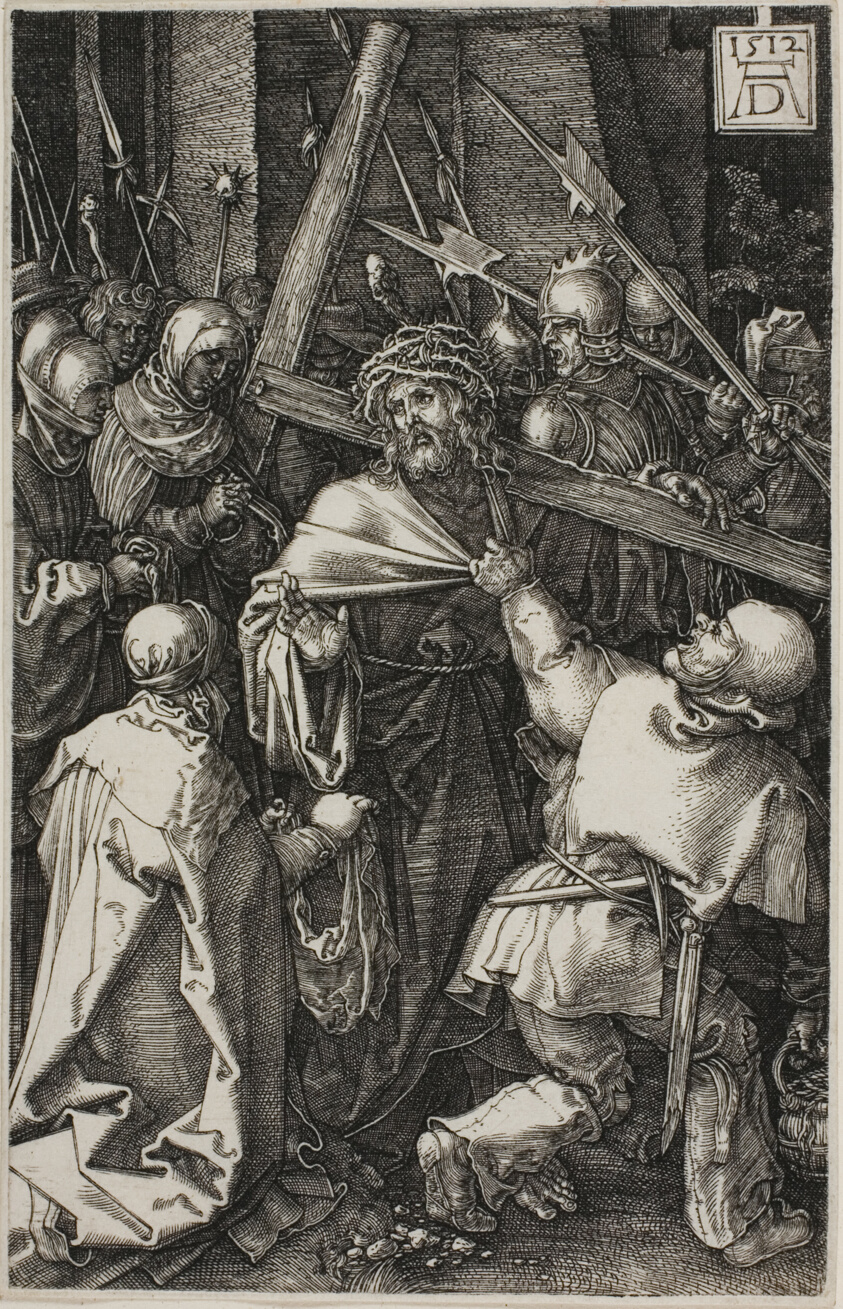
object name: Print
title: Bearing of the Cross, from The Engraved Passion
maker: Albrecht Dürer (German, 1471-1528)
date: 1512, published 1513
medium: Engraving in black on ivory laid paper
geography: Germany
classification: engraving; print; prints and drawing; paper